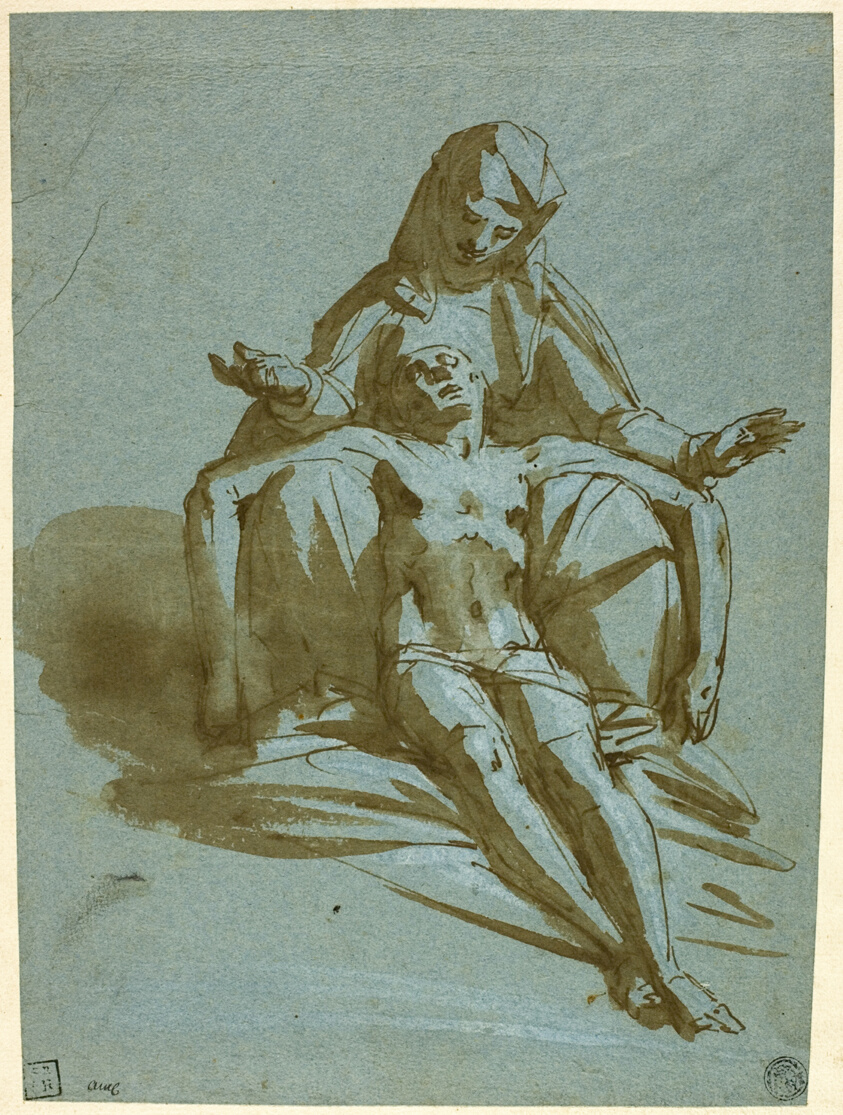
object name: Drawing and Watercolor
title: Pietà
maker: Attributed to Luca Cambiaso; Italian, 1527-1585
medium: Pen and brown ink with brush and brown wash, heightened with lead white, on blue wove paper, laid down on ivory wove paper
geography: Italy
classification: pen and ink drawings; drawings (visual works); prints and drawing